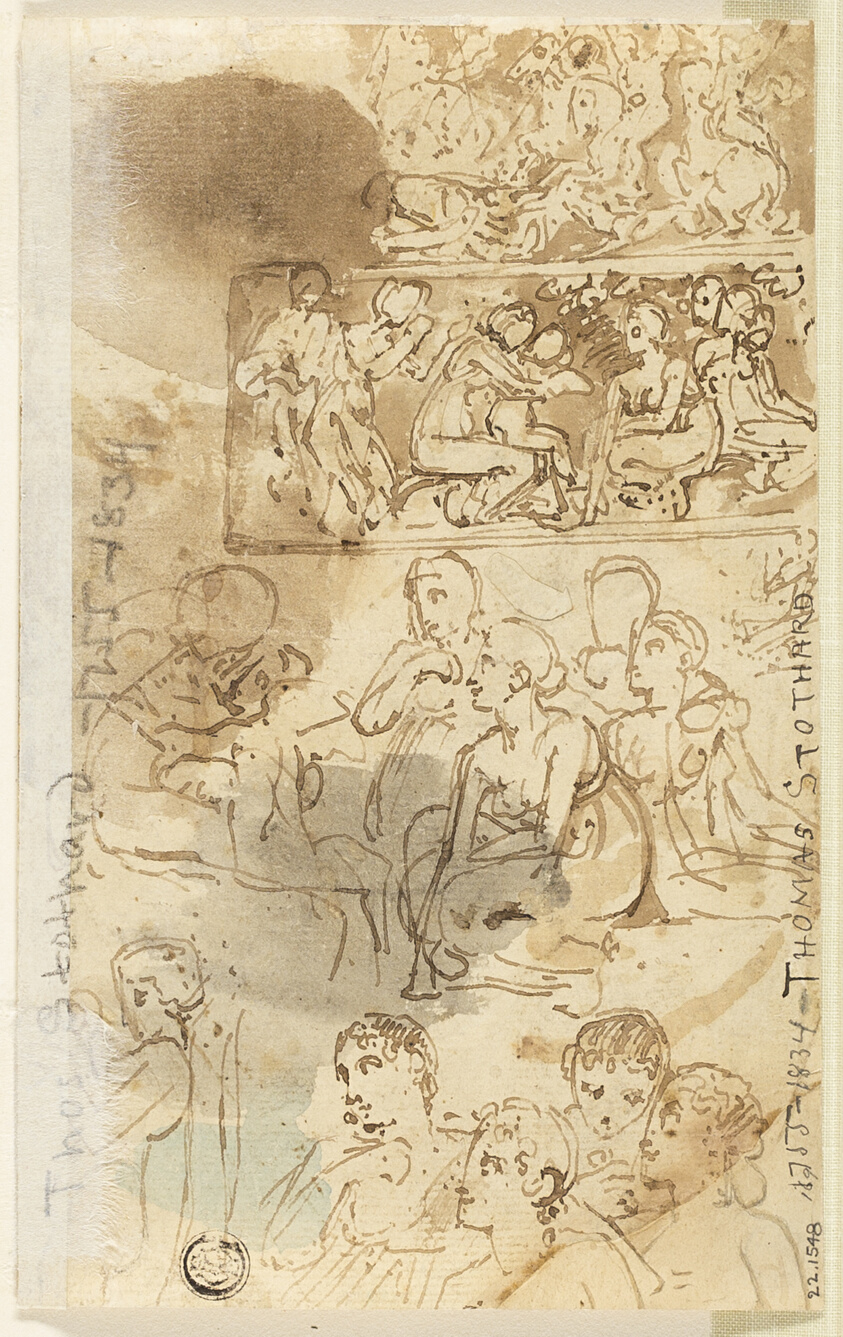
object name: Drawing and Watercolor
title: Sketches for Silver Salver (recto); Sketches of Friezes, Groups of Women (verso)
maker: Recto by Thomas Stothard (English, 1755-1834); Verso possibly by Thomas Stothard (English, 1755-1834)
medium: Pen and brown ink (recto), and pen and brown ink with brush and brown wash and watercolor (verso); on cream wove paper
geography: England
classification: pen and ink drawings; drawings (visual works); prints and drawing